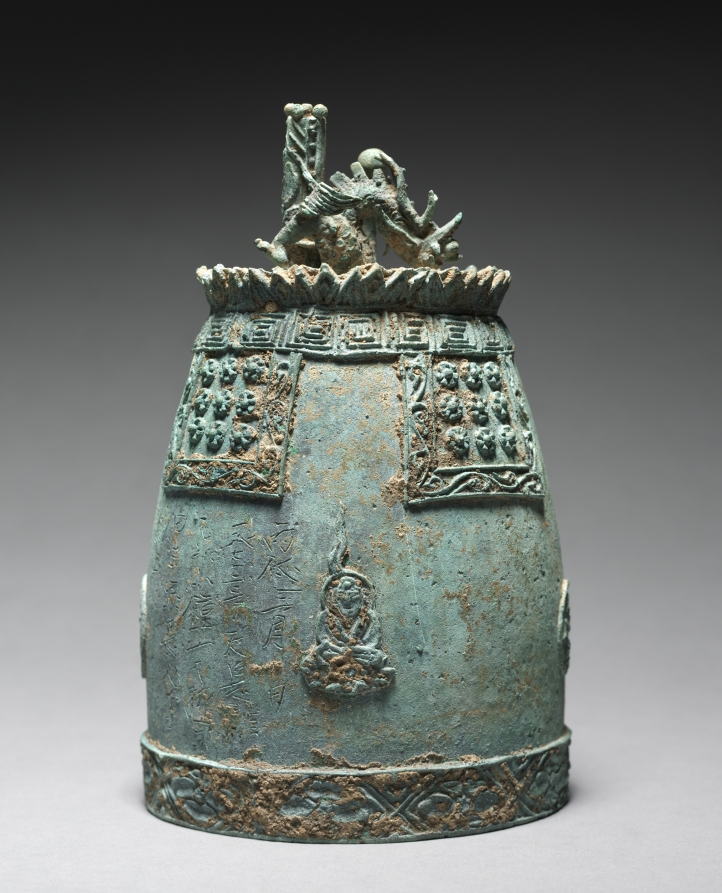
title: Bronze Ritual Bell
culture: Korea, Goryeo dynasty (918–1392)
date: 1226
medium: cast bronze with incised inscription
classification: Metalwork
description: This miniature bell was once used as part of Buddhist indoor rituals. Likely suspended in a Buddhist temple, it features a cast dragon and a vertical tube to amplify the sound on top, and is decorated with Buddhist figures seated on lotuses. The echoing sound of the bell was thought to help Buddhist believers understand the significance of transience and impermanence; the sound instantly fades away as soon as one hears it. This sensory experience creates a striking conceptual parallel with Buddhist teachings, including the idea that all things and beings exist merely in our perception or imagination. An inscription indicates it was cast in the year of the dragon and took three years to make.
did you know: The inscription informs us that this miniature indoor bell was produced in 1226.